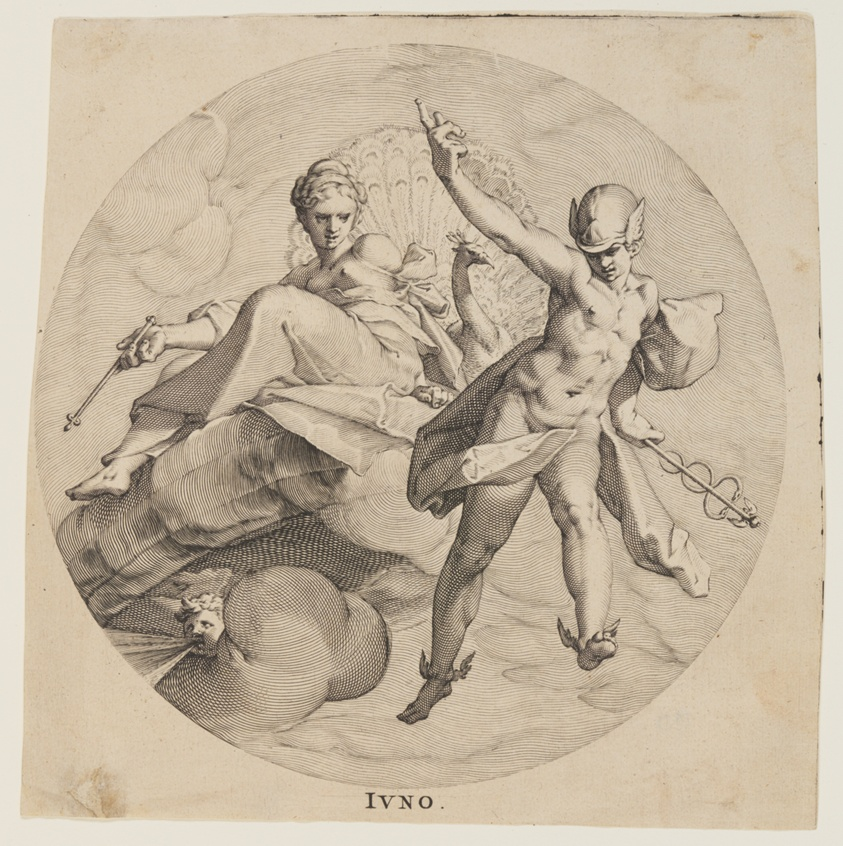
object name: Print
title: Juno, from The Three Goddesses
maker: Egbert van Panderen (Dutch, c. 1581–1628); after Bartholomeus Spranger (Flemish, 1546–1611)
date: c. 1600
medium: Engraving on ivory laid paper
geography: Netherlands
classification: print; paper; prints and drawing; engraving